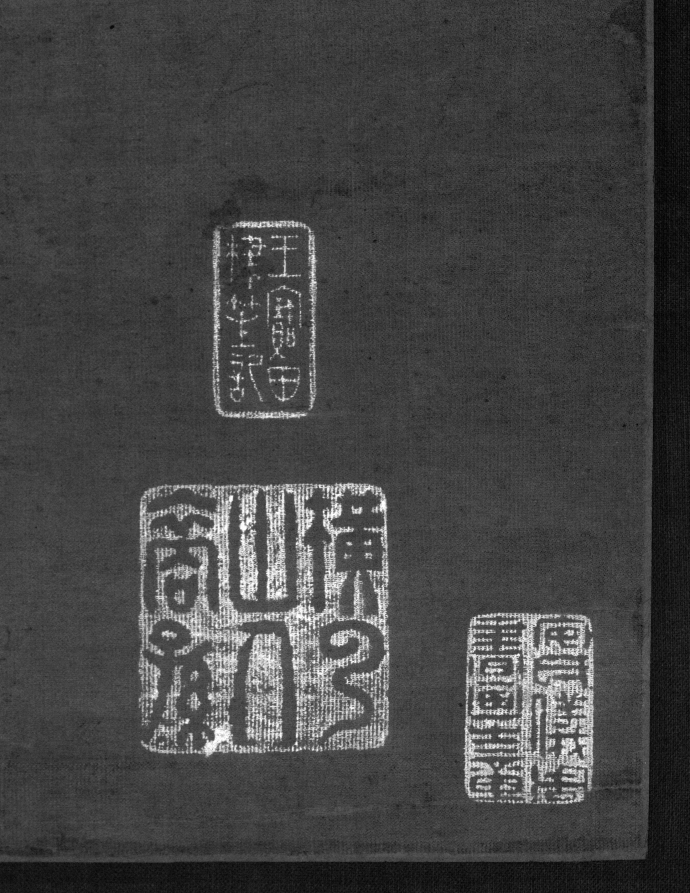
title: Summer Mountains (after Dong Yuan [active c. 937–75])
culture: China, Yuan dynasty (1271-1368)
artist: attributed to Huang Gongwang (Chinese, 1269–1354)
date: 1290–1354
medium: hanging scroll; ink and slight color on silk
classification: Painting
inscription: 【印】一峰道人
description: This monumental landscape is drawn in softly rounded strokes with darker lines frequently applied on top of lighter ones. This technique recalls one of the suggestions included in a collection of the artist's writings known as Secrets of Landscape Painting: The most difficult thing in painting is using the ink. The artist begins by using dilute ink and builds it up to the point where it begins to look right, then uses dense, black ink, applied fairly dry, and washes of deeper-toned ink. This technique distinguishes the fields from the paths, the far from the near. Huang Gongwang may have learned this technique from observing nature through the eyes of an earlier master, Dong Yuan, a painter whose style he shared.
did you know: The wet hills and moist, rich atmosphere evoke the southern Chinese summer, characterized by monsoon rains and lush growth.